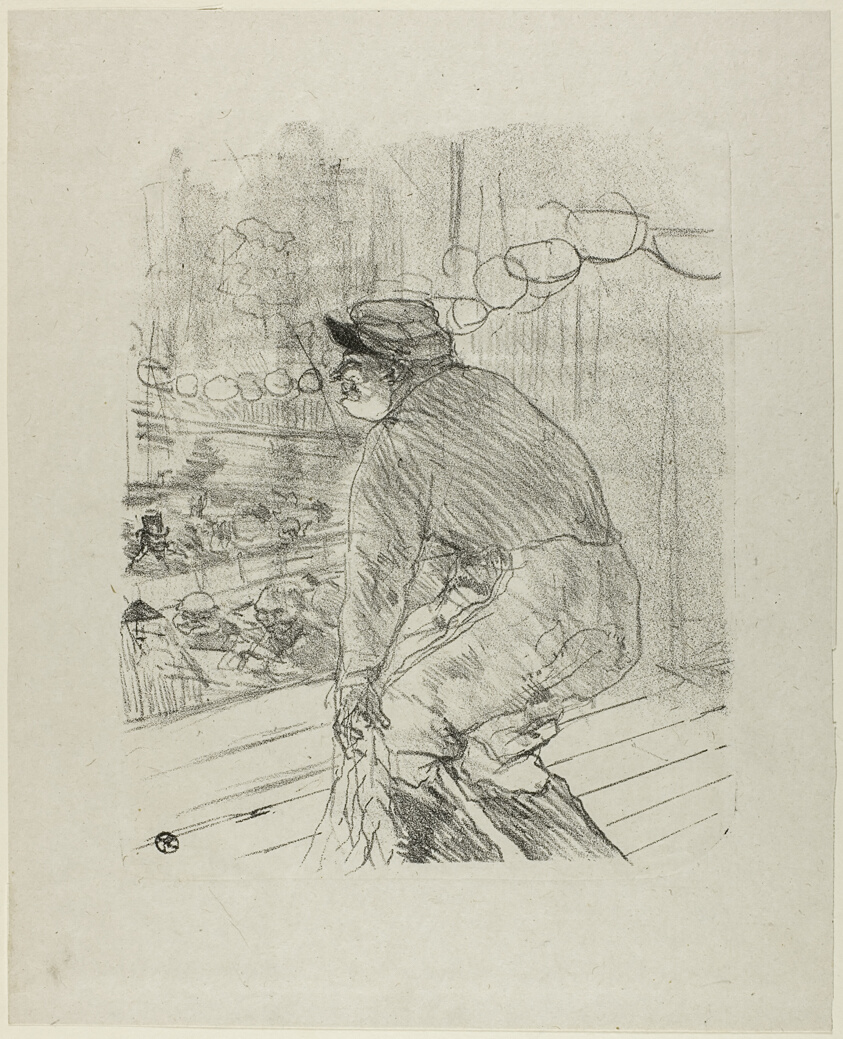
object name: Print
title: Polin, from Treize Lithographies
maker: Henri de Toulouse-Lautrec (French, 1864-1901)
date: 1898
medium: Lithograph on ivory laid paper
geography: France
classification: lithograph; print; prints and drawing